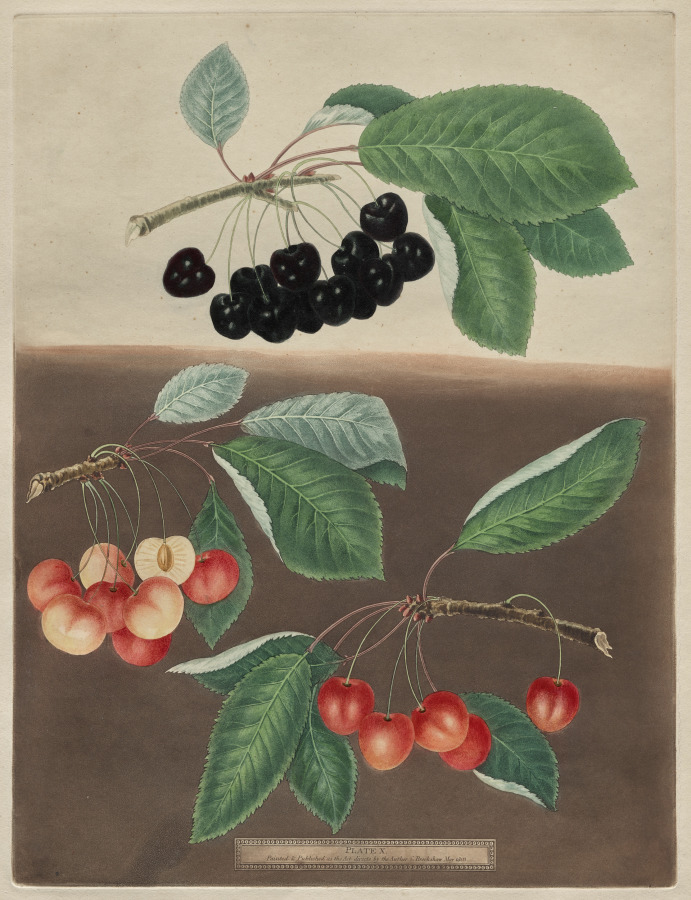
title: Pomona Britannica: No. 10 - Cherries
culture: England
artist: George Brookshaw (British, 1751–1823)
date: 1805, published 1812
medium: aquatint and stipple engraving printed in color and hand colored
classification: Print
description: This color aquatint etching is one plate from George Brookshaw’s 1812 illustrated volume Pomona Britannica. Named after the Roman goddess of fruit trees, gardens, and orchards, Brookshaw intended the volume to be the English “country gentleman’s” guide to the science of classifying and identifying fruits (pomology). Many of Brookshaw’s models came from the Royal Gardens at Hampton Court and Kensington Gardens. Each print featured one fruit, often life-size, including detailed depictions of its flower and leaves. Printed in color with hand-painted highlights, this and other illustrated botanicals formed an essential part of the cultured English library in the early 19th century.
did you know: King Henry VIII of England (r. 1508-47) ordered cherries be introduced to England after tasting them on the continent.